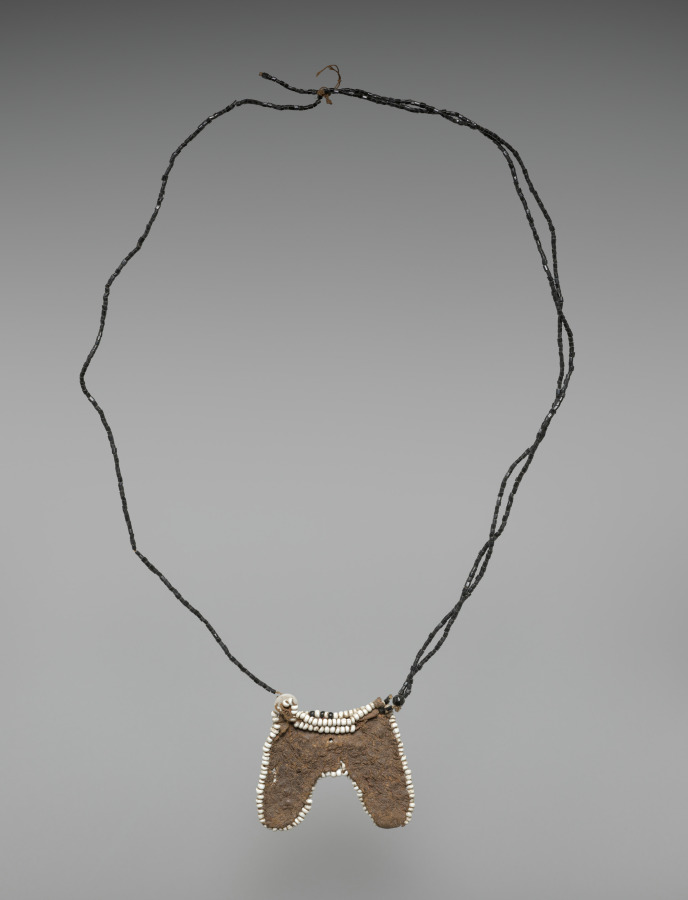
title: Royal ceremonial beadwork: pendant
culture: Africa, Southern Africa, South Africa, Southeast Cape Region, Unknown female Xhosa-style maker(s)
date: 1800s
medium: Glass beads, sinew, and ceramic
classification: Mixed Media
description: Elite Xhosa women once wore beaded garments like this on festive occasions. Made almost completely from imported Venetian or Bohemian glass beads, they were overt status symbols. Imported beads functioned as money for the Xhosa between about 1770 and 1829. These garments’ female maker carefully selected beads of the highest quality, uniform in color, shape, and size. Made in the same shape as the pendant, a swallowtail-shaped apron (CMA 2010.206) worn under the skirt completed the ensemble.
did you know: The beads to make an ensemble like this cost several cattle in the early 1800s, an amount most couldn't afford.